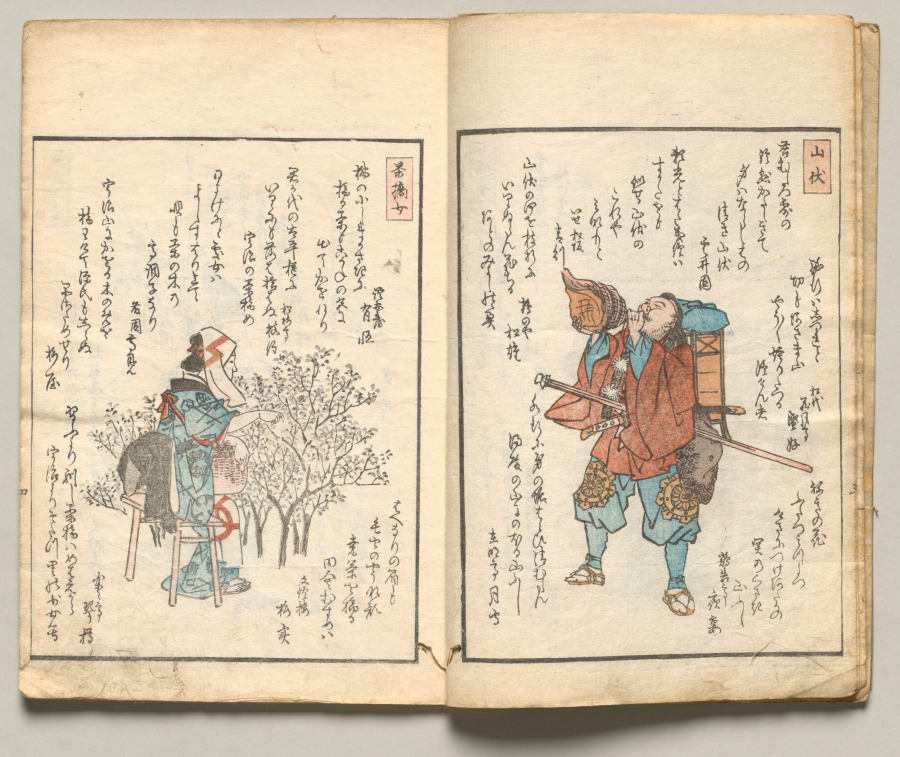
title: Spread Four from Volume Seven of People of Japan in Light Verse (Kyōka)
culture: Japan, Edo period (1615–1868)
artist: Utagawa Hiroshige (Japanese, 1797–1858)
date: 1857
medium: Woodblock-printed book; ink and color on paper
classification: Bound Volume